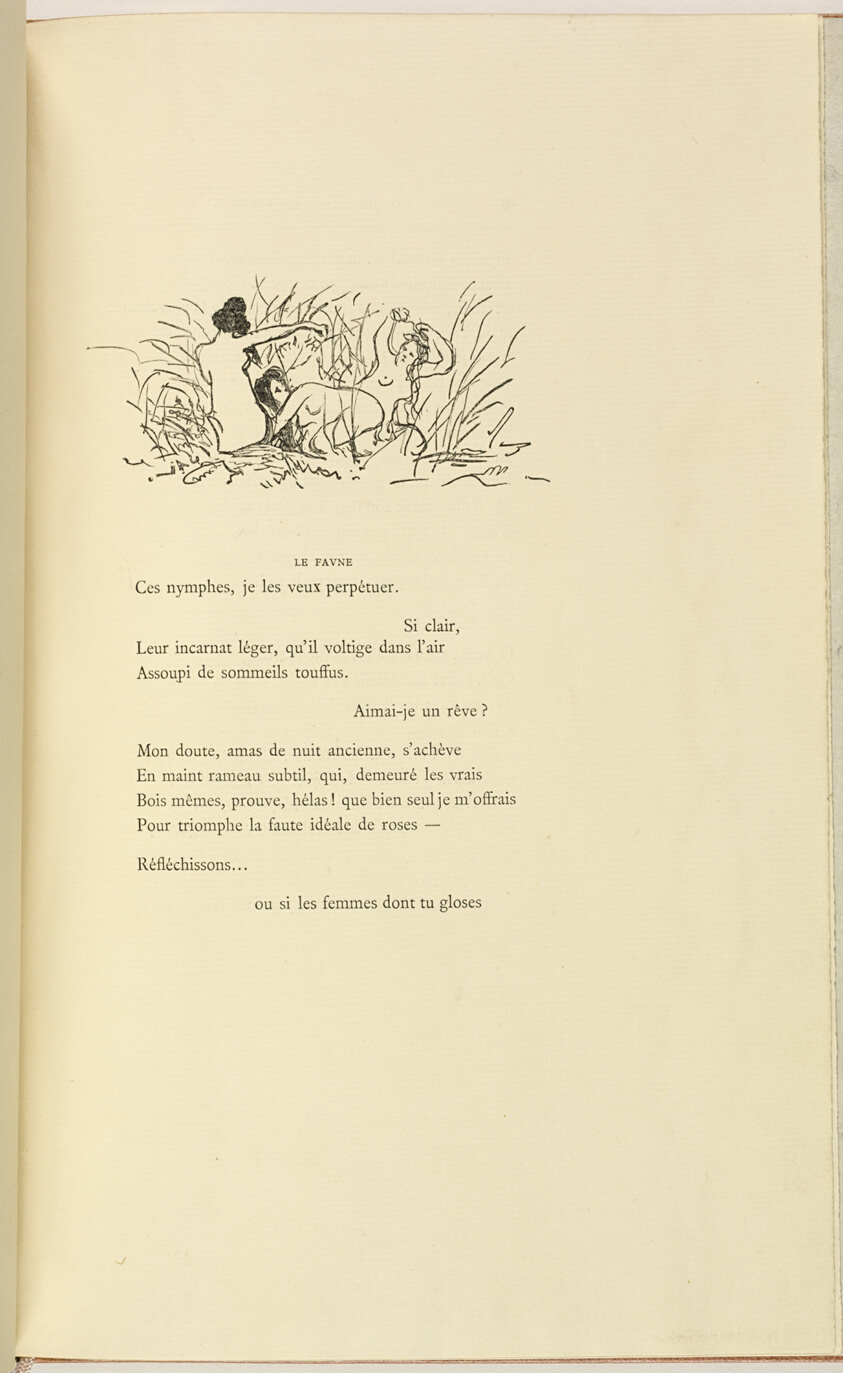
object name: Book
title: L'après-midi d'un faune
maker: Édouard Manet (French, 1832-1883); poetry by Stéphane Mallarmé (French, 1842-1898); published by Alphonse Derenne (French, born 1836); bookbinding by Jacques Anthoine Legrain (French, born 1907)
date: 1876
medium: Book with four wood engravings in black on various laid and wove papers, two handcolored with pink wash, rebound and housed in slipcase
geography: France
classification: wood engraving; book; prints and drawing